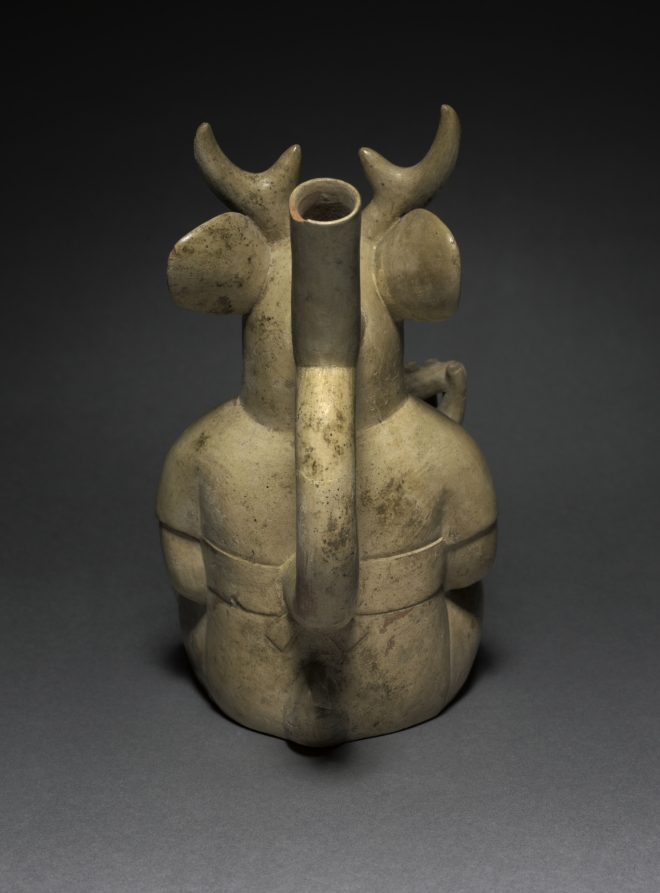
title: Deer-Headed Figure Vessel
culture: Central Andes, North Coast, Moche people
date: 200–850 CE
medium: ceramic, slip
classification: Vessels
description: Moche imagery includes an intriguing world of creatures that mingle traits from different realms: beans sprout human legs and race up a spout, jars leap with human feet to pour themselves, and animals wield weapons in two hands. This figure, with a stag’s head but a human’s body, is an example. He is engaged in a coca-leaf chewing ritual and thus holds a bag for the leaves along with a container of powdered lime that is one of the ritual’s key ingredients.